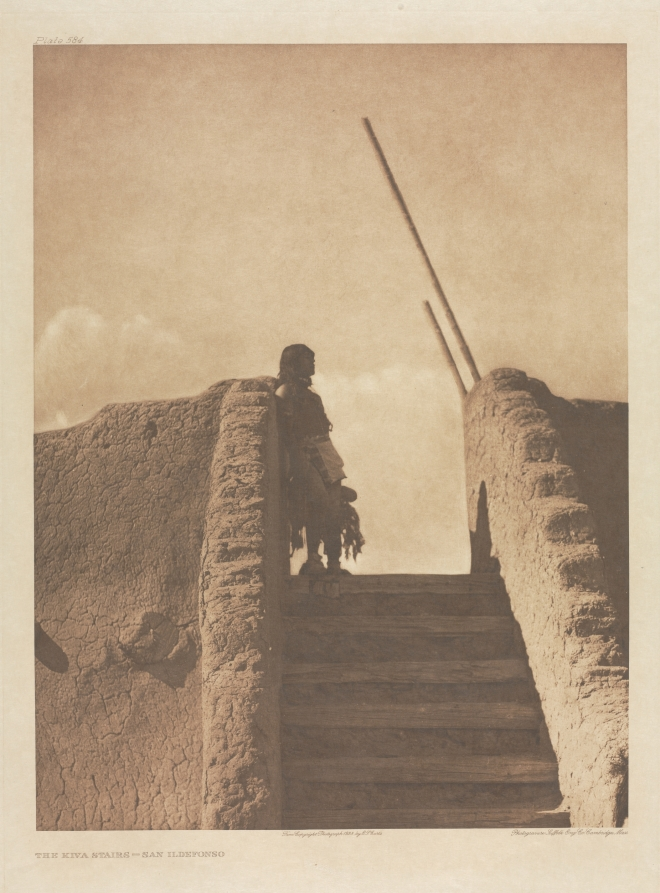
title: Portfolio XVII, Plate 585: The Fruit Gatherer - San Ildefonso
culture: America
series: The North American Indian: being a series of Portfolios picturing and describing the Indians of the United States, the Dominion of Canada, and Alaska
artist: Edward S. Curtis (American, 1868–1952)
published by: The University Press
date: 1905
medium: photogravure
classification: Portfolio